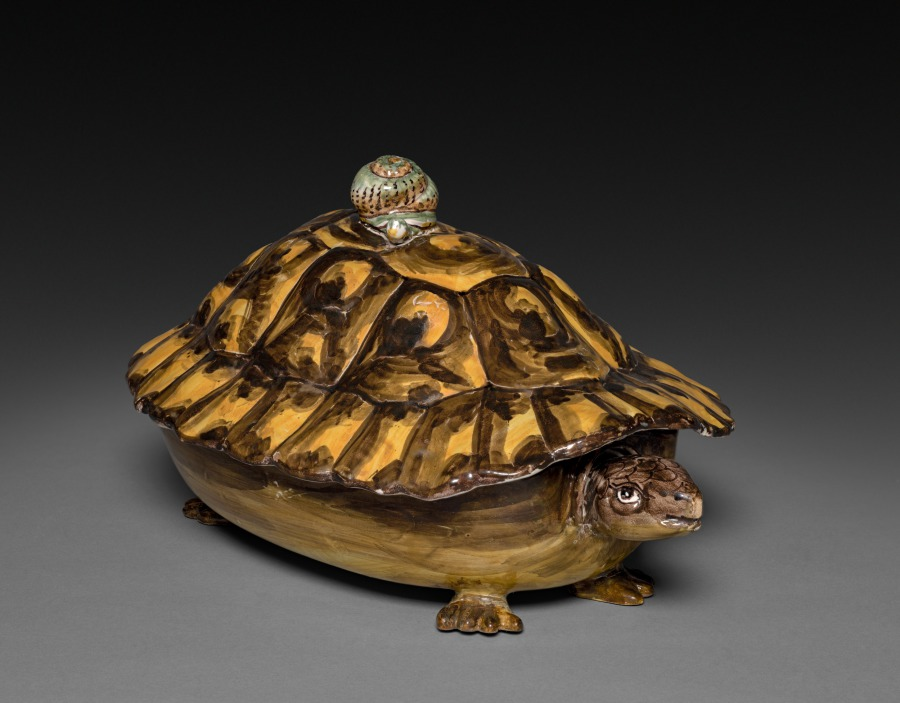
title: Covered Tureen in the Form of a Turtle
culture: France, mid 18th century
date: c. 1745–65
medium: faience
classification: Ceramic